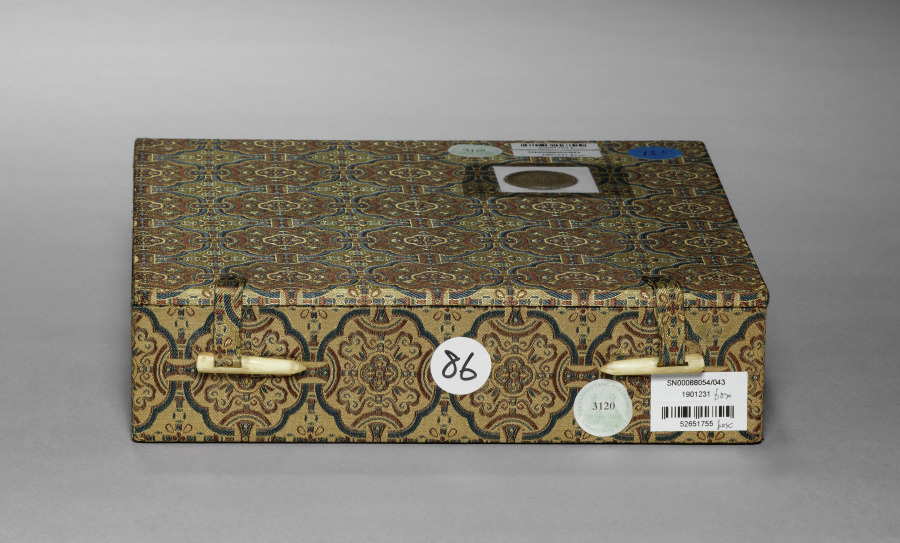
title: Flat Dish Made of Marbled Clay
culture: North or Central China, Northern Song (960–1127) or Jin dynasty (1115–1234)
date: 960–1234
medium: Stoneware with marbled clay and transparent glaze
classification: Ceramic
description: Using the marbling technique, in which light- and dark-colored clays are kneaded together (jiaotai; 絞胎), this dish is entirely covered with a transparent glaze, further enhancing the contrasting effect. The mixed clay technique had been used in northern China since the Tang dynasty (618–906), suggesting that potters may have attempted to imitate the effect of precious marbled glass from the ancient Near East that was traded via the Silk Road. The Keithleys acquired this dish to accompany the monumental ink drawing Poetic Pattern of Song Ware (CMA 2020.146) in their collection, that was inspired by such a ceramic.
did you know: This dish features lively contrasting black and beige clay marbling underneath a transparent glaze.